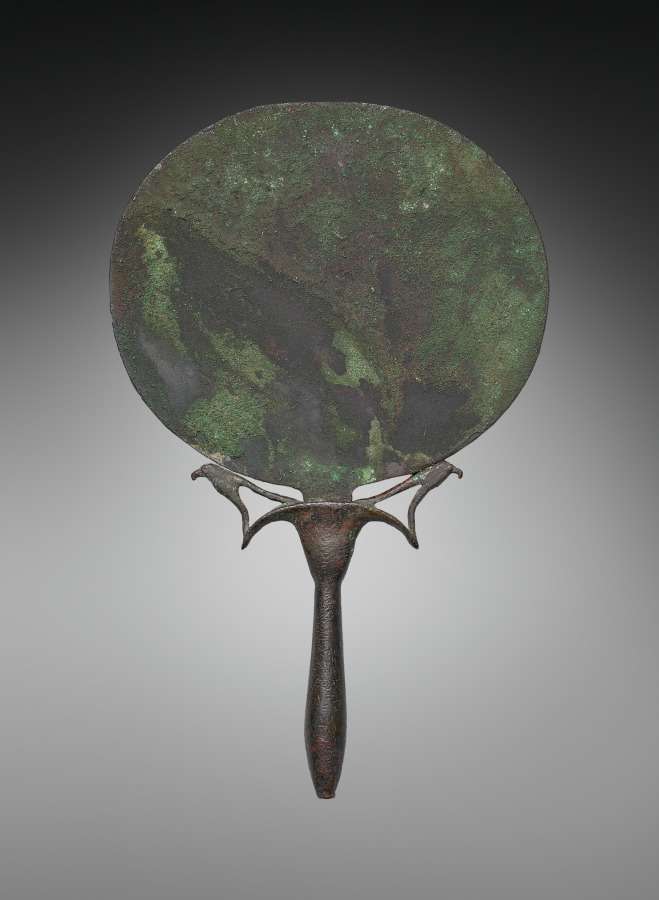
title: Mirror with Falcons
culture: Egypt, New Kingdom (1540–1069 BCE), Dynasty 18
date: 1540–1296 BCE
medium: mirror of copper, handle of tin-bronze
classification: Cosmetic Objects